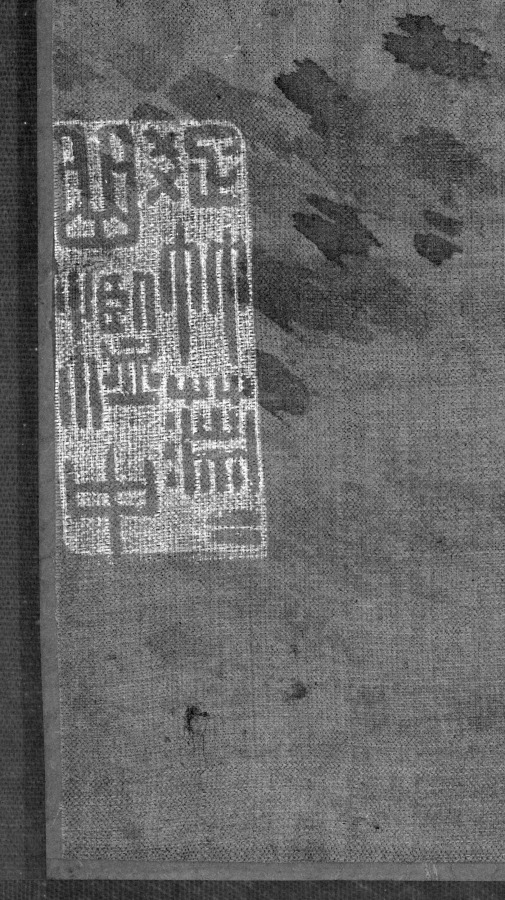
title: Bamboo in the Wind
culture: China, Qing dynasty (1644–1911)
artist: Ma Yu (Chinese, active 1706–1724)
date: 1724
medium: hanging scroll; ink on silk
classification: Painting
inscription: Artist's inscription and signature in upper left corner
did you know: In traditional Chinese culture, bamboo symbolizes a gentleman's virtuous resilience and flexibility.